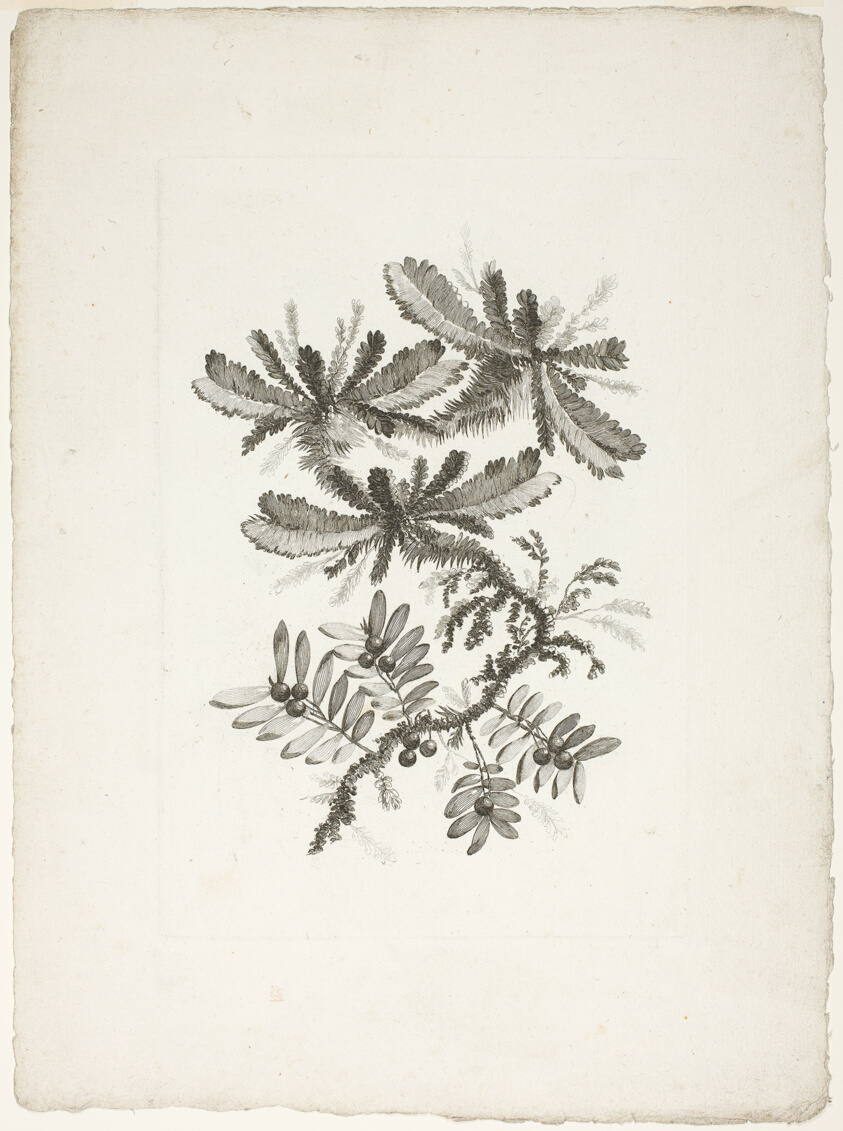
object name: Print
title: Bouquet, from Collection of New Flowers of Taste for the Manufacture of Persian Cloth, Invented and Drawn by Jean Pillement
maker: Johann Heinrich Hess (Germany, born 1746); after Jean-Baptiste Pillement (French, 1728-1808); published by Charles Leviez (French, 1708-1778)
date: 1765/70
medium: Etching on ivory laid paper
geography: Germany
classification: etching; print; prints and drawing